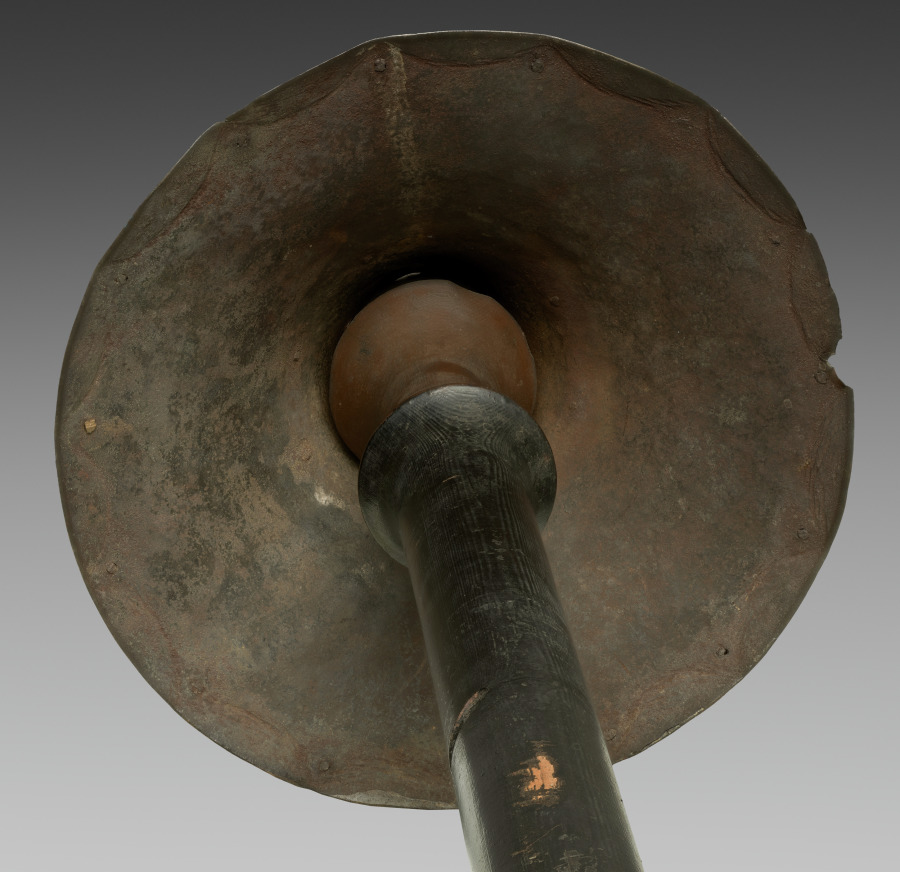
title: Tilting Lance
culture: Germany, late 19th-early 20th Century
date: c. 1875–1925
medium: steel and wood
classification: Arms and Armor